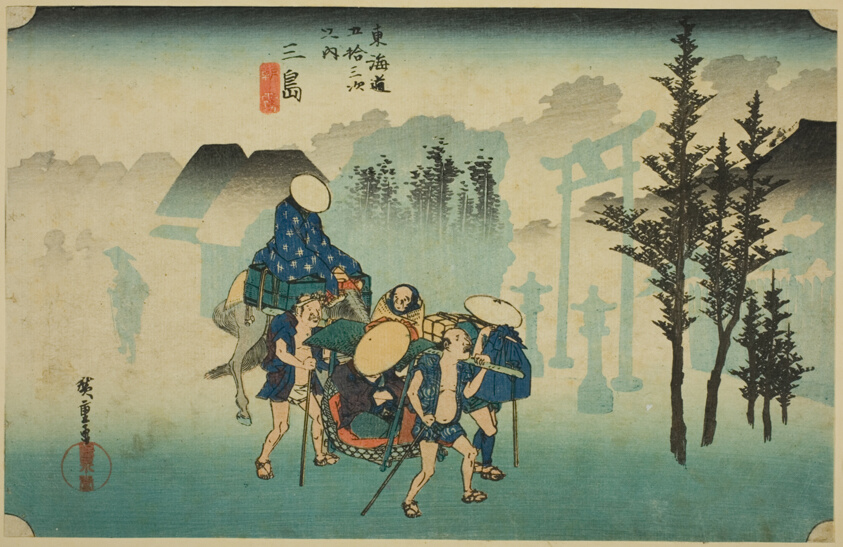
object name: Print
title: Mishima: Morning Mist (Mishima, asagiri), from the series "Fifty-three Stations of the Tokaido Road (Tokaido gojusan tsugi no uchi)," also known as the Hoeido Tokaido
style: Japanese (culture or style), edo (japanese period), Japanism, East Asian, asian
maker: Utagawa Hiroshige 歌川 広重; Japanese, 1797-1858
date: c. 1833/34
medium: Color woodblock print; oban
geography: Japan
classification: woodblock print; print; asian art